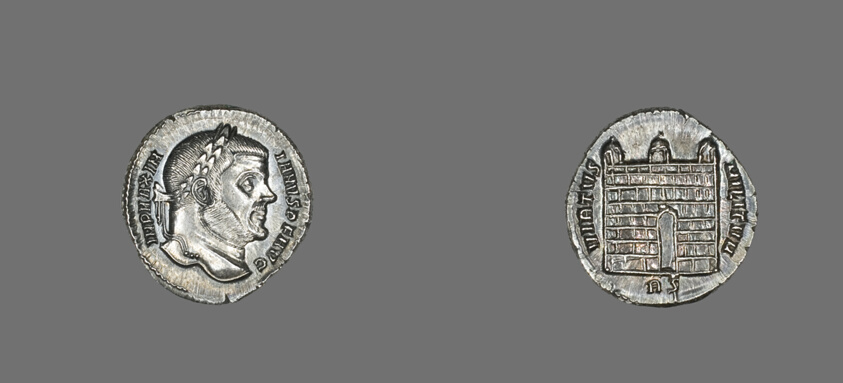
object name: Coin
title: Denarius (Coin) Portraying Galerius Maximianus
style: imperial (roman)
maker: Roman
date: 307-310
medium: Silver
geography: Rome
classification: coin; ancient art